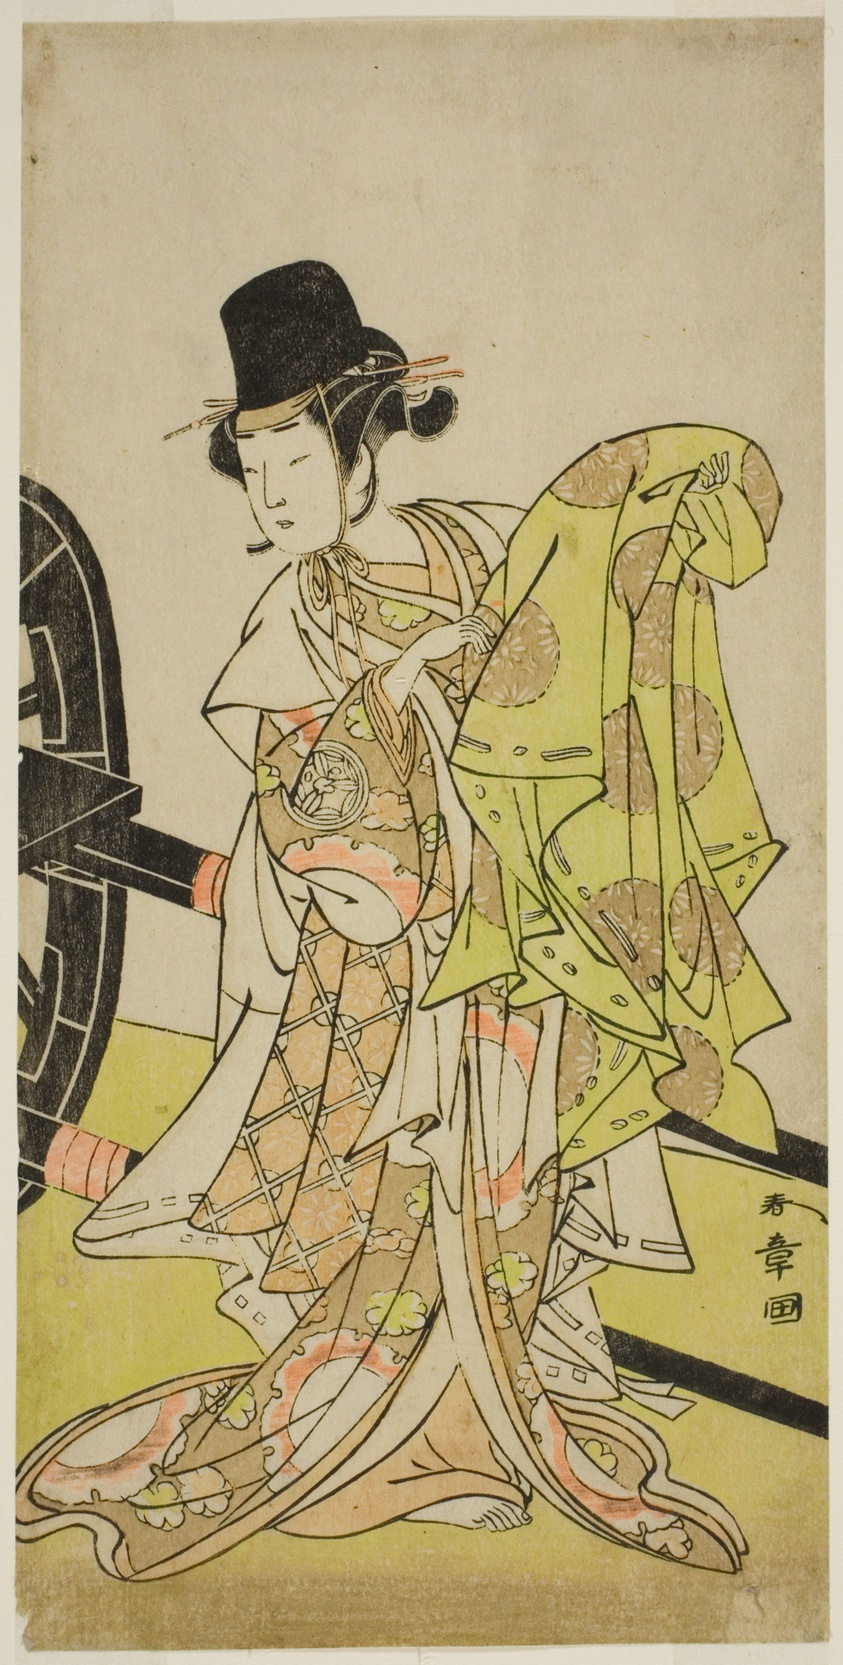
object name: Print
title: The Actor Yamashita Kinsaku II as Tsukimasu, Acting as Sakura-maru, in the Play Miya-bashira Iwao no Butai, Performed at the Morita Theater in the Seventh Month, 1773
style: Japanese (culture or style)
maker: Katsukawa Shunsho 勝川 春章; Japanese, 1726-1792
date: c. 1773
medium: Color woodblock print; hosoban; right sheet of triptych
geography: Japan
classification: woodblock print; print; asian art